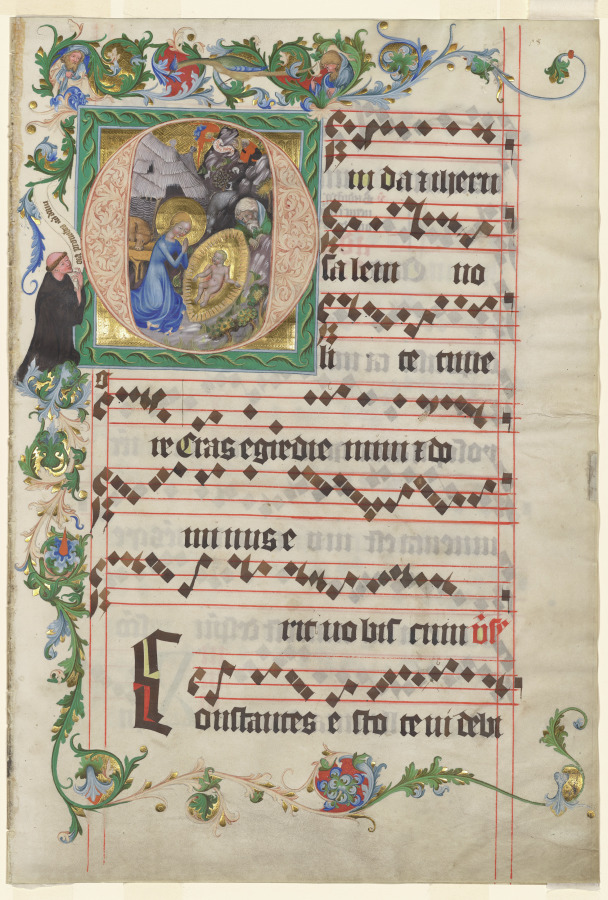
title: Bifolio from an Antiphonary: Historiated Initial O with the Nativity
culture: Bohemia, Prague, 15th century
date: early 1400s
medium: ink, tempera, and gold on parchment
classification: Manuscript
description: This splendid bifolium (a sheet folded in half to form two leaves) once formed part of an important antiphonary produced for an unidentified Benedictine monastery in Bohemia. With its rich illumination, it provides an important example of Bohemian painting during the opening years of the 15th century as well as painting in the city of Prague, one of the great court centers of Europe. The decoration of the leaf is dominated by a majestic initial O that depicts the Nativity. A scene in the background shows the angel Gabriel’s Annunciation to the Shepherds. The initial itself is placed within a square frame outside of which a single Benedictine monk observes the sacred event. The initial introduces the Latin chants for the first vespers of Christmas Day: O iuda et iherusalem (“Oh Judea and Jerusalem”). Framing the text are luxurious, scrolling acanthus leaves. Within the upper margin, two prophets emerge from the lush, foliated tendrils to observe the nativity below. In this way, the foretelling of the birth of Christ in the Old Testament is established visually.